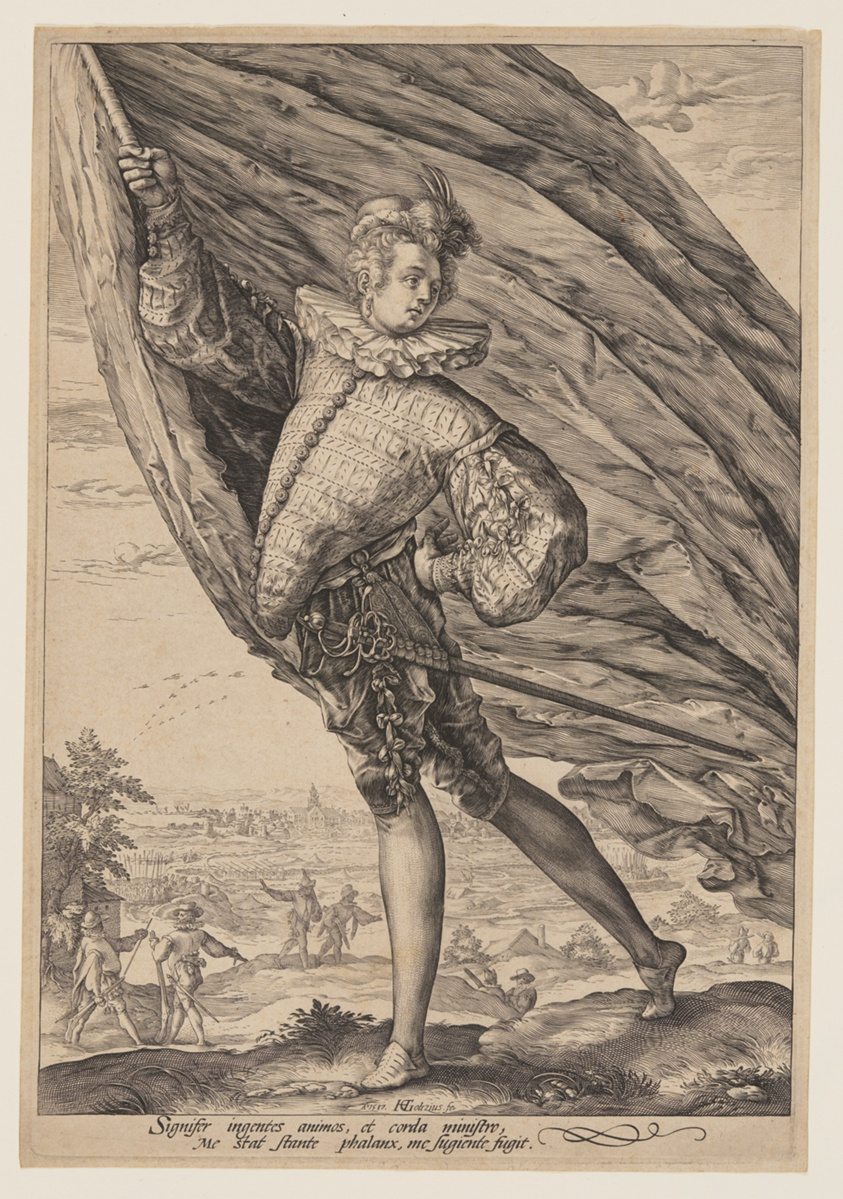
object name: Print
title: The Standard Bearer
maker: Hendrick Goltzius (Dutch, 1558–1617)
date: 1587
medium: Engraving on ivory laid paper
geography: Netherlands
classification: engraving; paper; print; prints and drawing